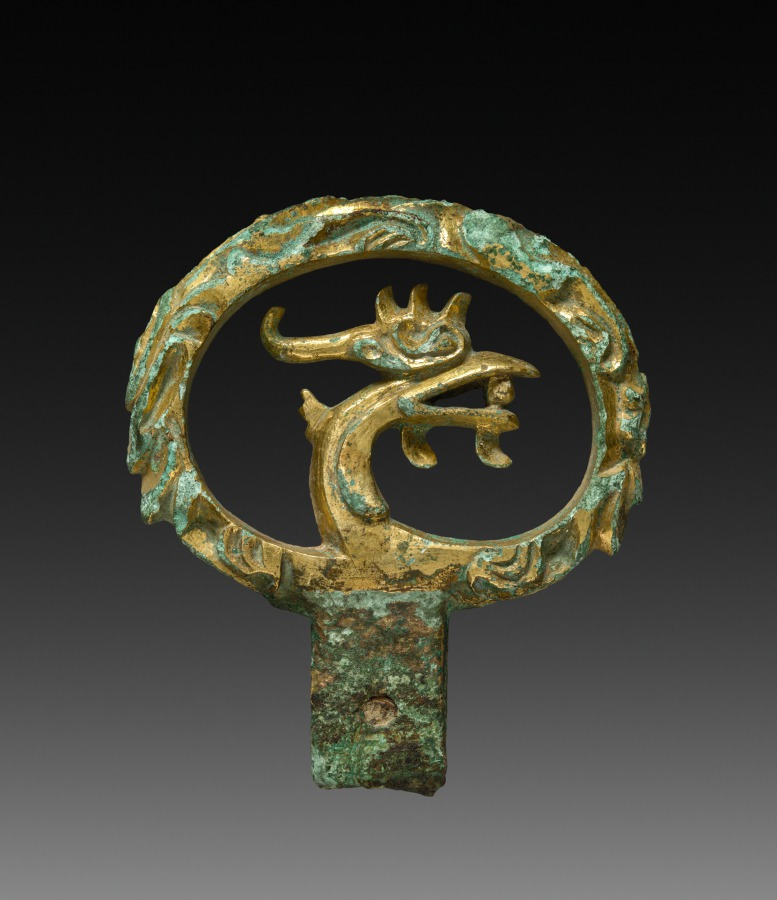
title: Sword-hilt with Phoenix Head Ring Pommel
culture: Japan, Kofun period (300–710 CE)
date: 500s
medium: gilt bronze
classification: Metalwork